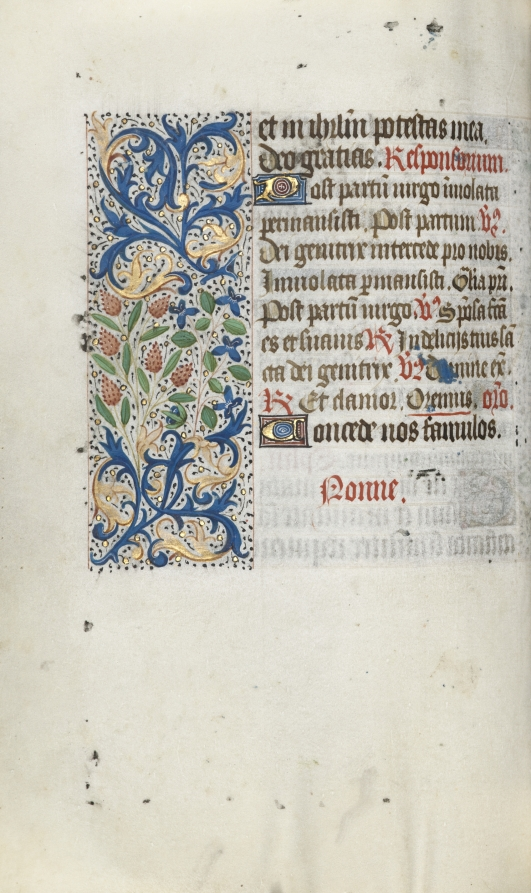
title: Book of Hours (Use of Rouen): fol. 66v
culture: France, Rouen, 15th century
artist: Master of the Geneva Latini (French, active Rouen, 1460–80)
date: c. 1470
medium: ink, tempera, and gold on vellum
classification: Bound Volume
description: In the late 1400s and early 1500s Rouen was an established and important center of book production. The city’s cathedral had a wealthy chapter that spent large sums of money to commission books and to maintain its extensive library. The stationers and booksellers would have likely been concentrated in or near the cathedral precinct. This artist, named after a manuscript now in Geneva, was Rouen’s principal illuminator during the second half of the 1400s.